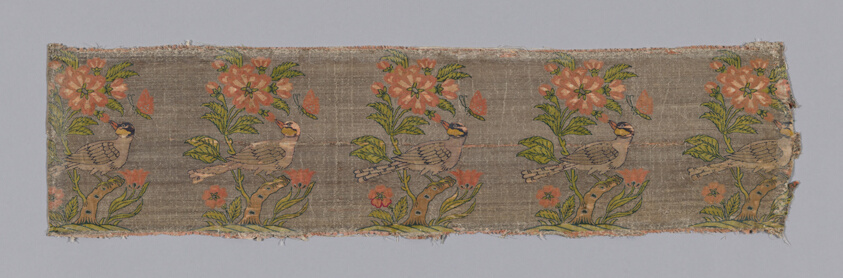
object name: Textile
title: Dress or Furnishing Fabric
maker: Iran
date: late 17th century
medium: Silk, gilt-metal-strip-wrapped silk and silver-metal-strip-wrapped silk; twill weave foundation with supplementary twill weave and brocading wefts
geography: Iran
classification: textile; weaving; furnishing textile